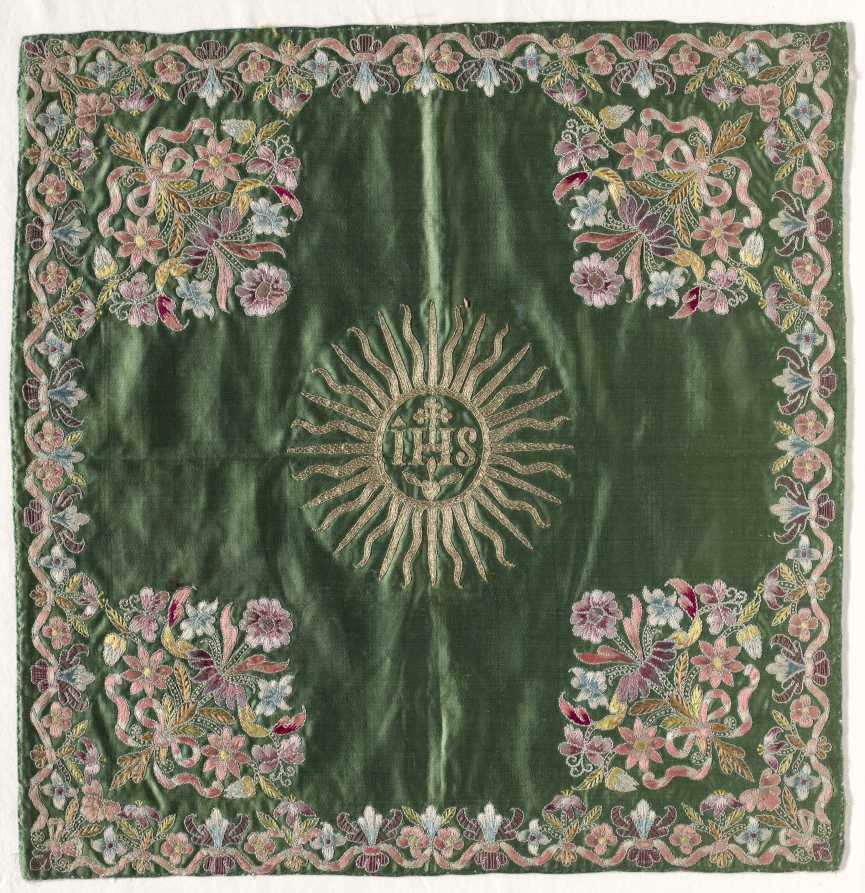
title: Chalice Veil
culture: Italy, 18th century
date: 1700s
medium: embroidered satin and silk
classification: Embroidery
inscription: in center: "I H S."